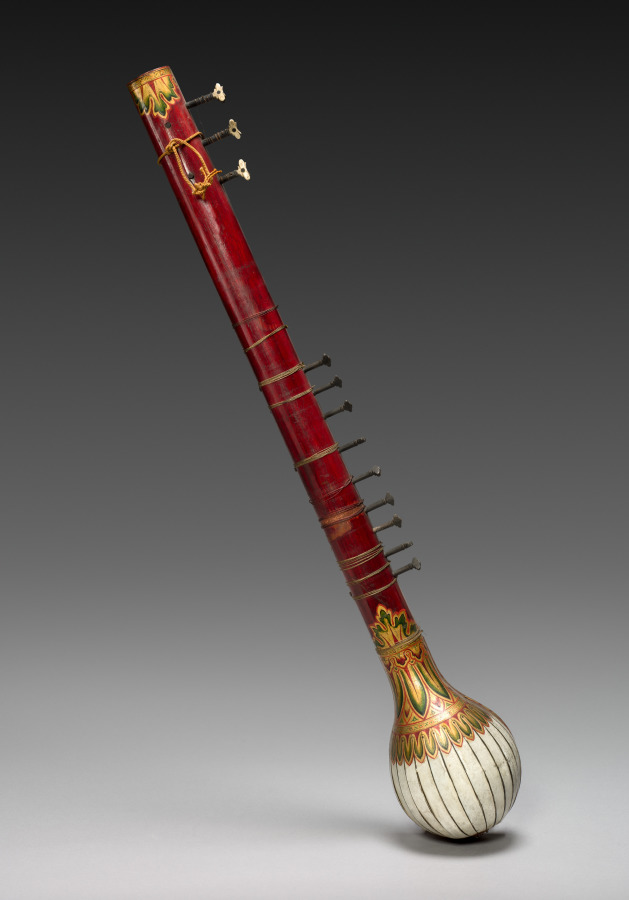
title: Sitar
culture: Eastern India, Bengal or Bangladesh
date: c. 1850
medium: Gourd and wood with pigment, ivory, and bone; copper alloy: frets; iron alloy: strings (with one modern copper replacement)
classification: Musical Instrument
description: The stringed instrument known as the sitar usually provided the central sound for the musical performances that were a constant feature of court life in India. The sitar could then be accompanied by percussion, voice, and other supporting instruments. In Raja Deen Dayal’s photograph Maharaja of Rewa in Prayer (2016.266.21), a musician strums a sitar in order to please the deities on the royal altar. The improvised compositions are played in a mode, or key, that correlates to the time of day and season of the year.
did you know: Many paintings of Indian court life depict female musicians holding and playing this kind of lightweight stringed instrument.